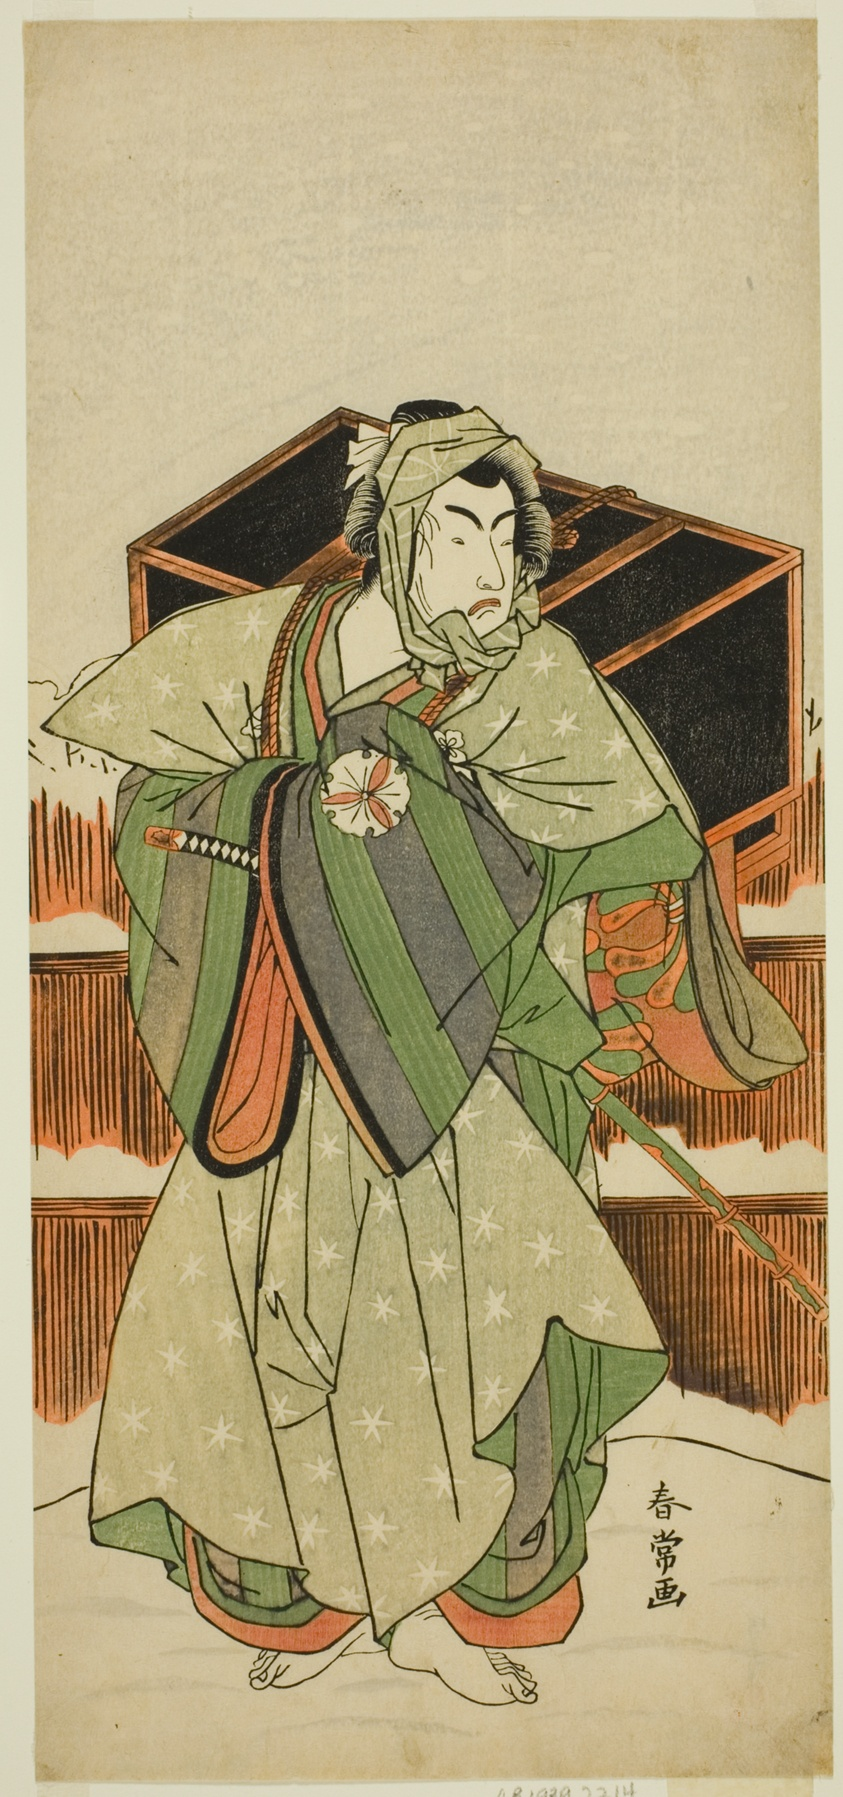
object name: Print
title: The Actor Matusmto Koshiro IV as Ise no Saburo Disguised as Mizoro no Sabu in the Play Mure Takamatsu Yuki no Shirahata, Performed at the Ichimura Theater in the Eleventh Month, 1780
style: Japanese (culture or style)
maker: Katsukawa Shunjo; Japanese, died 1787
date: c. 1780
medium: Color woodblock print; hosoban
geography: Japan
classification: woodblock print; print; asian art